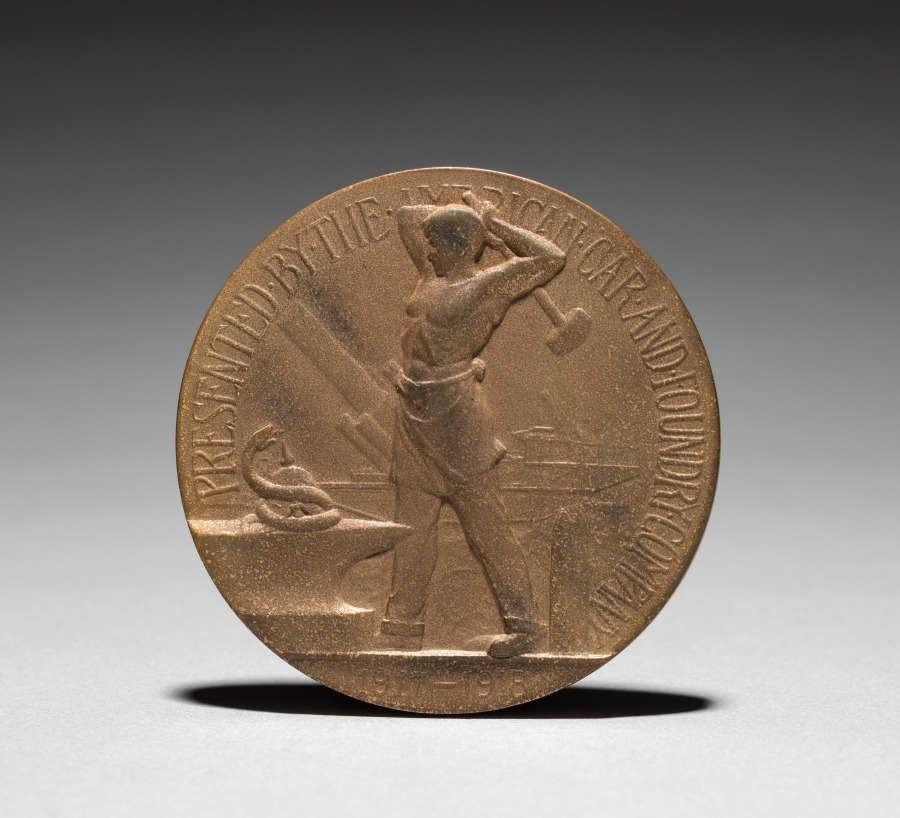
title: Honor Medal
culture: America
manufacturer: American Car and Foundry Co. (American)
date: 1917–1918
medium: bronze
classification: Metalwork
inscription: "For Service Faithfully Rendered"; signed: "C.B. - J.K."